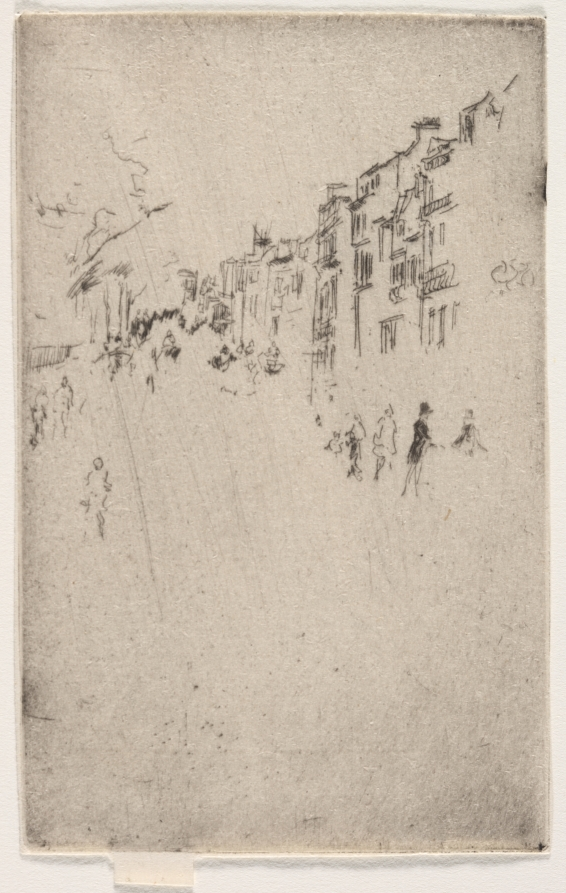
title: A Fragment of Piccadilly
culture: America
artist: James McNeill Whistler (American, 1834–1903)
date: 1886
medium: etching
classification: Print